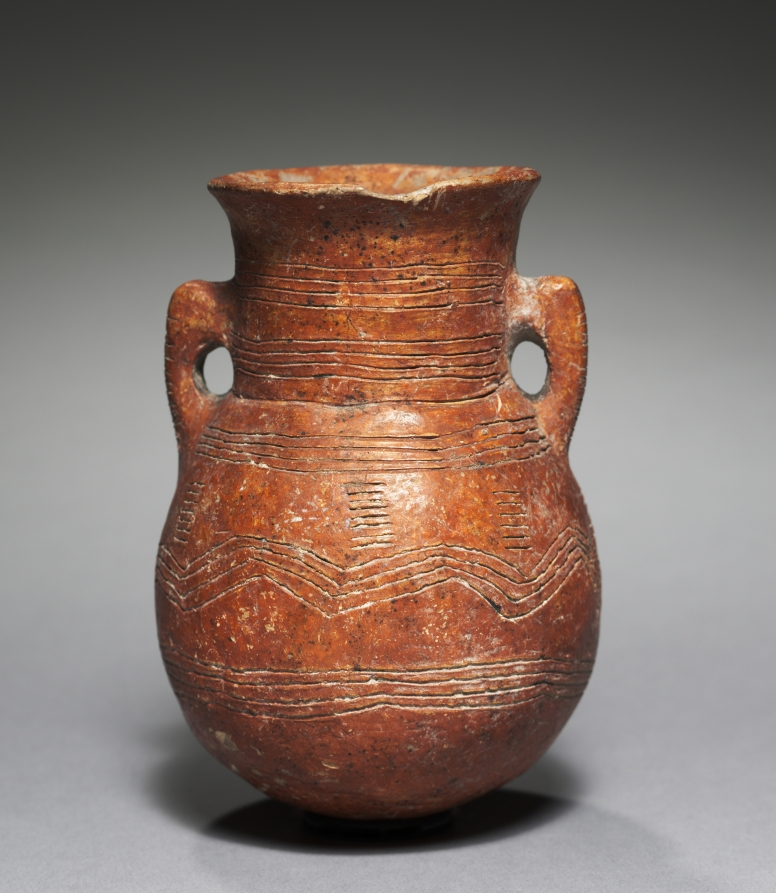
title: Amphora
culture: Cyprus, early Cypriot III–middle Cypriot I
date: c. 2000–1800 BCE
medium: red ware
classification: Ceramic